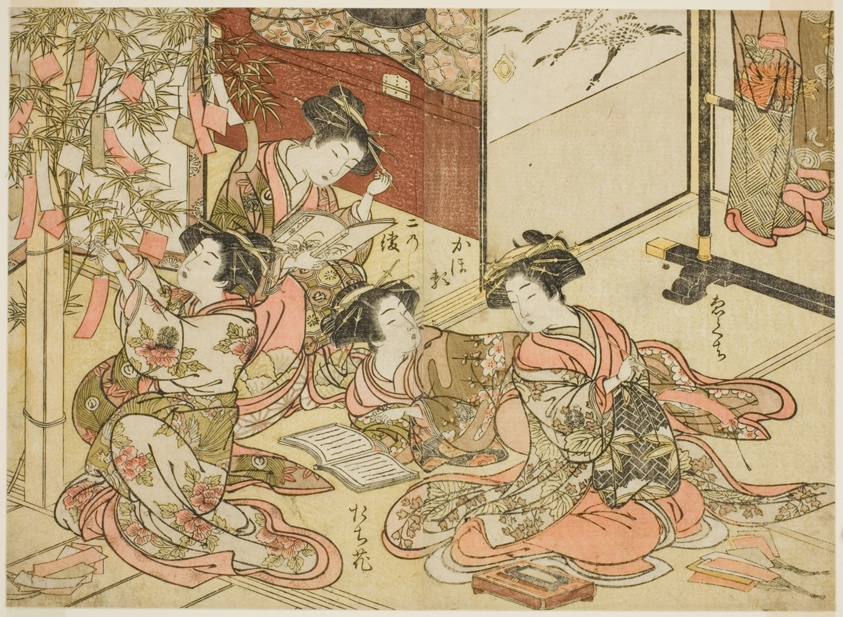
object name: Print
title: Courtesans of the Shin Kanaya, from the series "Mirror of Beautiful Women of the Pleasure Quarters (Seiro bijin awase sugata kagami)," vol. 2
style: Japanese (culture or style)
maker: Katsukawa Shunsho; Japanese, 1726-1792; Kitao Shigemasa; Japanese, 1739-1820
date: 1776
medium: Color woodblock print; double-page illustration cut from a book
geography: Japan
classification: woodblock print; print; asian art